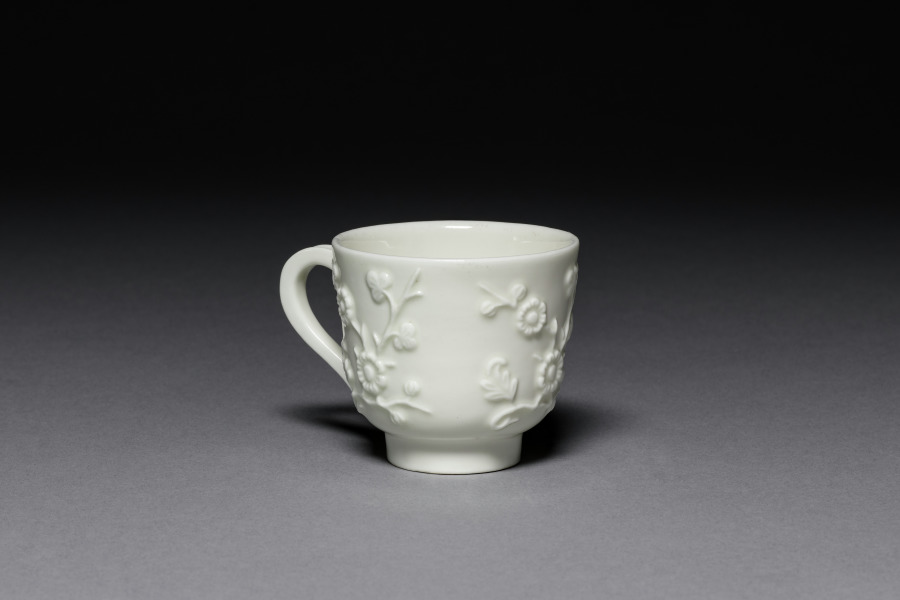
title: Cup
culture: France, 18th century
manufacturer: Saint Cloud Porcelain Factory (French)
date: 1775–1799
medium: soft-paste porcelain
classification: Ceramic